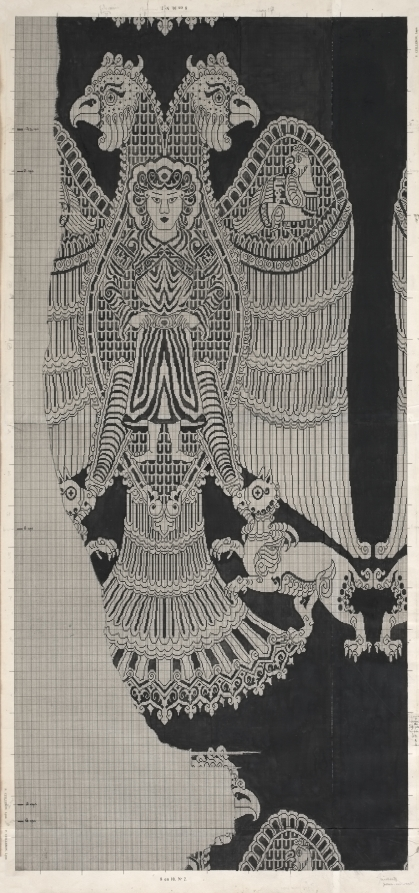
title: Schematic Drawing of Buyid Silk (1962.264)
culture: France, 20th century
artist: Félix Guichert (French)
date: 1900s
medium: ink on paper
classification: Drawing